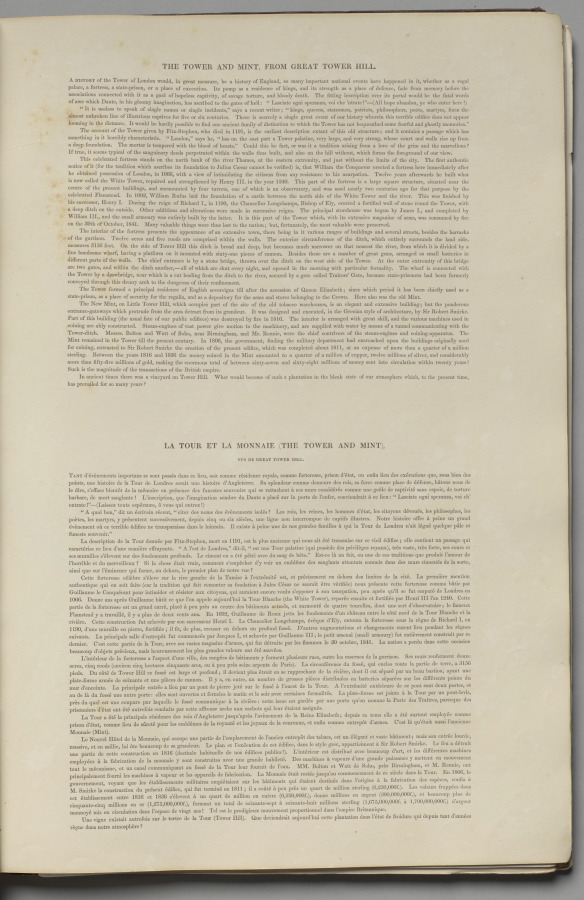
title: London As It Is: The Tower and Mint, from Great Tower Hill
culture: England, 19th century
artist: Thomas Shotter Boys (British, 1803–1874)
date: 1842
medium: lithograph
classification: Bound Volume